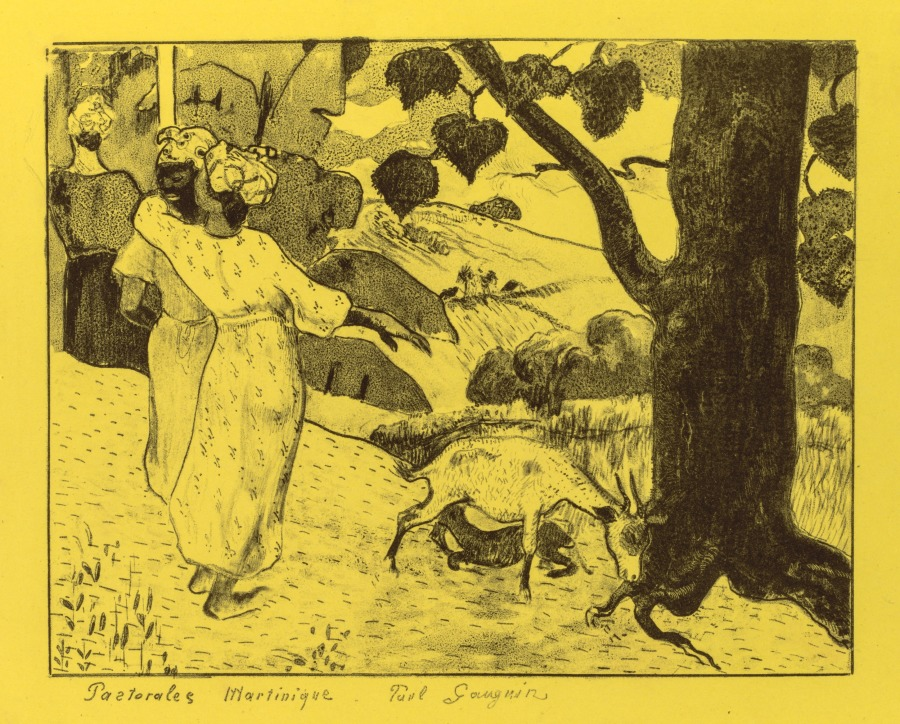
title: Volpini Suite: Martinique Pastoral (Pastorales Martinique)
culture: France, 19th century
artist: Paul Gauguin (French, 1848–1903)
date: 1889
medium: zincograph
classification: Print